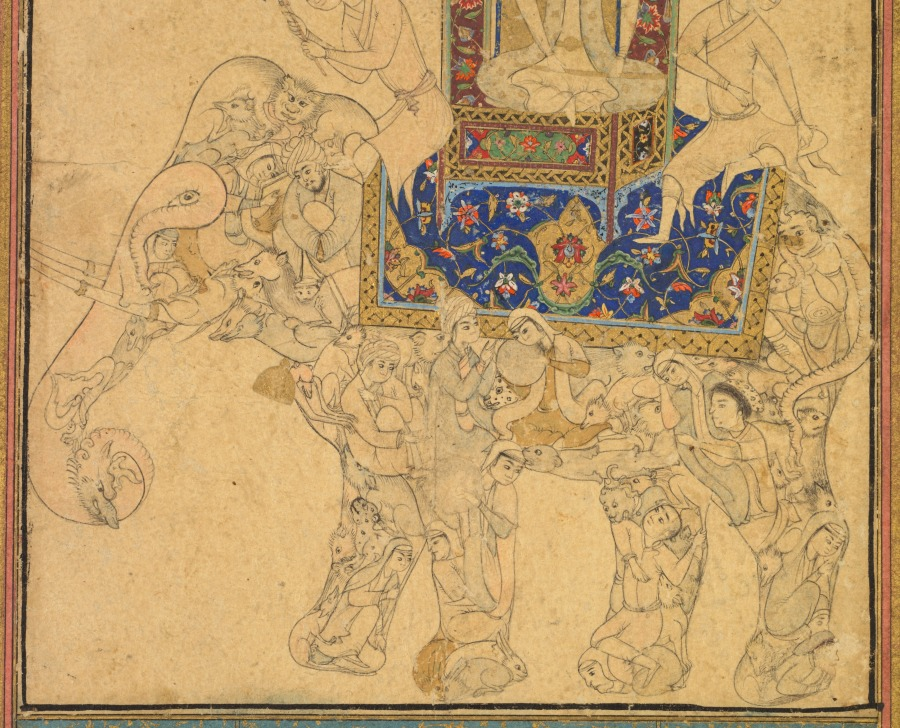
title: A prince riding a composite elephant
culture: India, Golconda, Deccan, 16th century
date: c. 1590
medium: Gum tempera, ink, and gold on paper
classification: Painting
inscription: Inscriptions: Calligraphy of Persian verses in top and bottom borders, in nasta‘liq script: Central verse (half-line on top, the other below the elephant’s feet): Given the foretold lackluster fortune of this abject servant Nothing is writ save words of your bounty Diagonal verses on top: The angelic beauties of paradise with their anxious dark-eyes set on the road Their glances throwing gold coins on the path (as a welcome) Diagonal verses below: The glittering full face of the sun is no more than a single drop From the perspiration behind his ear.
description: A prince sits cross-legged in a covered howdah seat secured to the back of a royal elephant with golden rings on its tusks. The elephant is being driven by attendants, one of whom holds a goad. Artists in the southern Indian region known as the Deccan expanded upon Persian practices of embedding creatures in landscape scenes—like a visual double-entendre—and created inventive images of composite creatures made up of figures that invite extended close looking. This painting would have been mounted in an album that was brought out for entertainment in elite intimate gatherings.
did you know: Two lions share one head at the top of the elephant’s head.